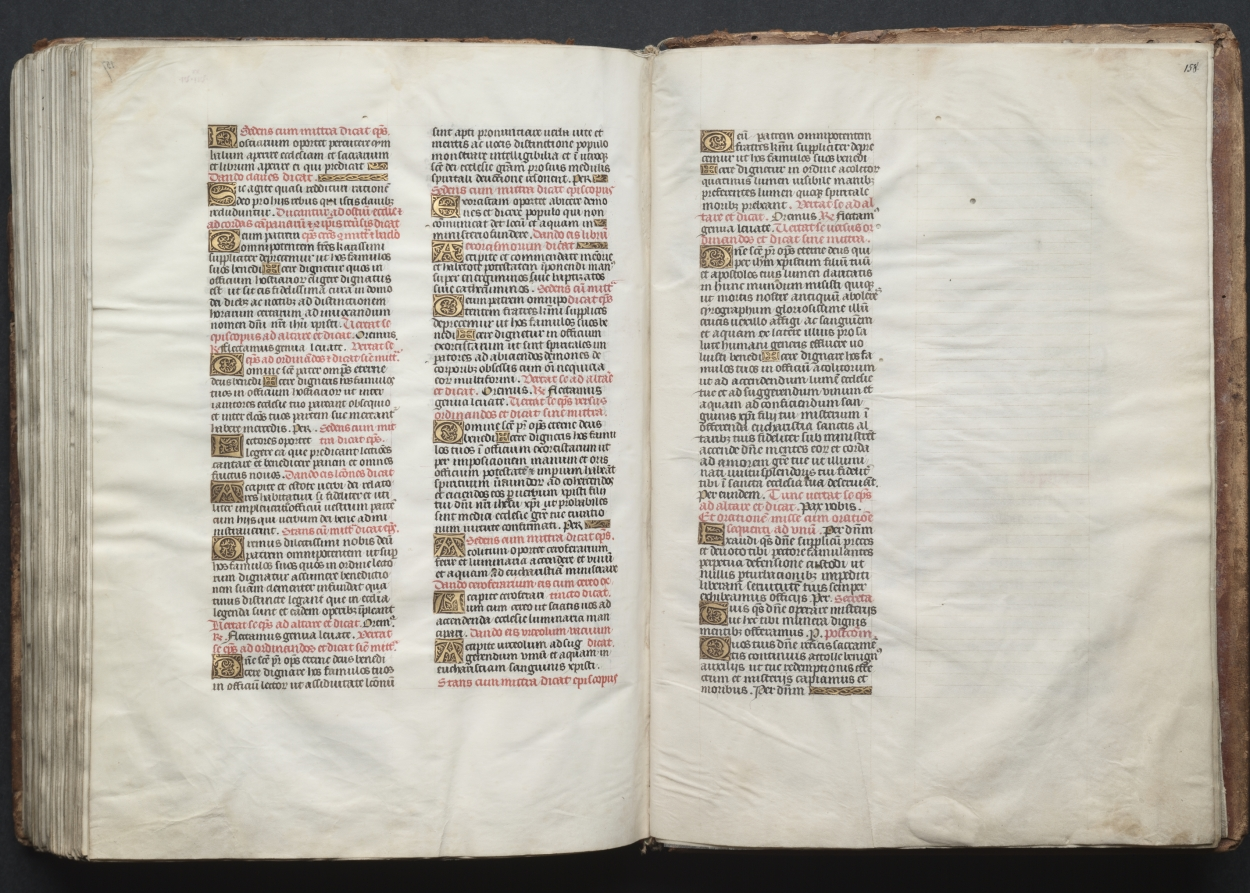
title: The Gotha Missal: Fol. 157v, Text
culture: France, Paris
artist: Master of the Boqueteaux (French)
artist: and Workshop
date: c. 1375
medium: ink, tempera, and gold on vellum; blind-tooled leather binding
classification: Bound Volume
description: The style and quality of this manuscript's decoration is typical of deluxe Parisian books made for aristocratic or royal patrons. Most of the book's decoration appears to be the work of the Master of the Boqueteaux, an artist active at the court of King Charles V (died 1380). His style was apparently shared by a number of book illuminators working in and around Paris. It is very possible that the Gotha Missal belonged to Charles V, but is not provable because the manuscript has no royal portraits and lacks a colophon. Given the book's magnificent decoration, however, it would seem that it was produced for a Valois prince, if not for the king himself. The manuscript receives its name from the German dukes of Gotha, its later owners.